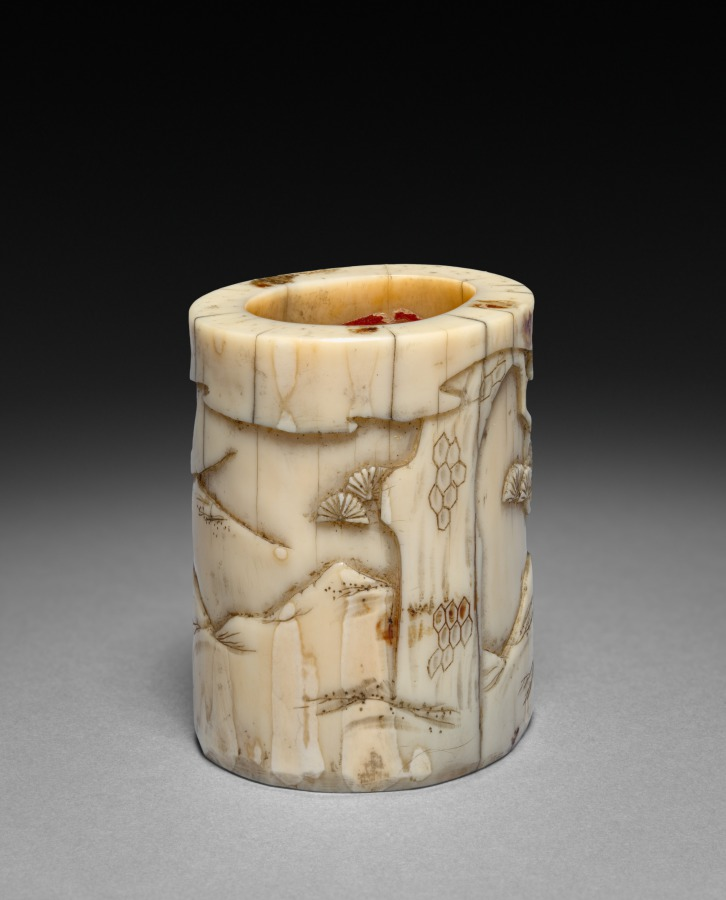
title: Carved Tusk with Chinese Immortal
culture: Japan, Meiji period (1868–1912)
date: c. 1868–1912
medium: Carved ivory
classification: Ivory